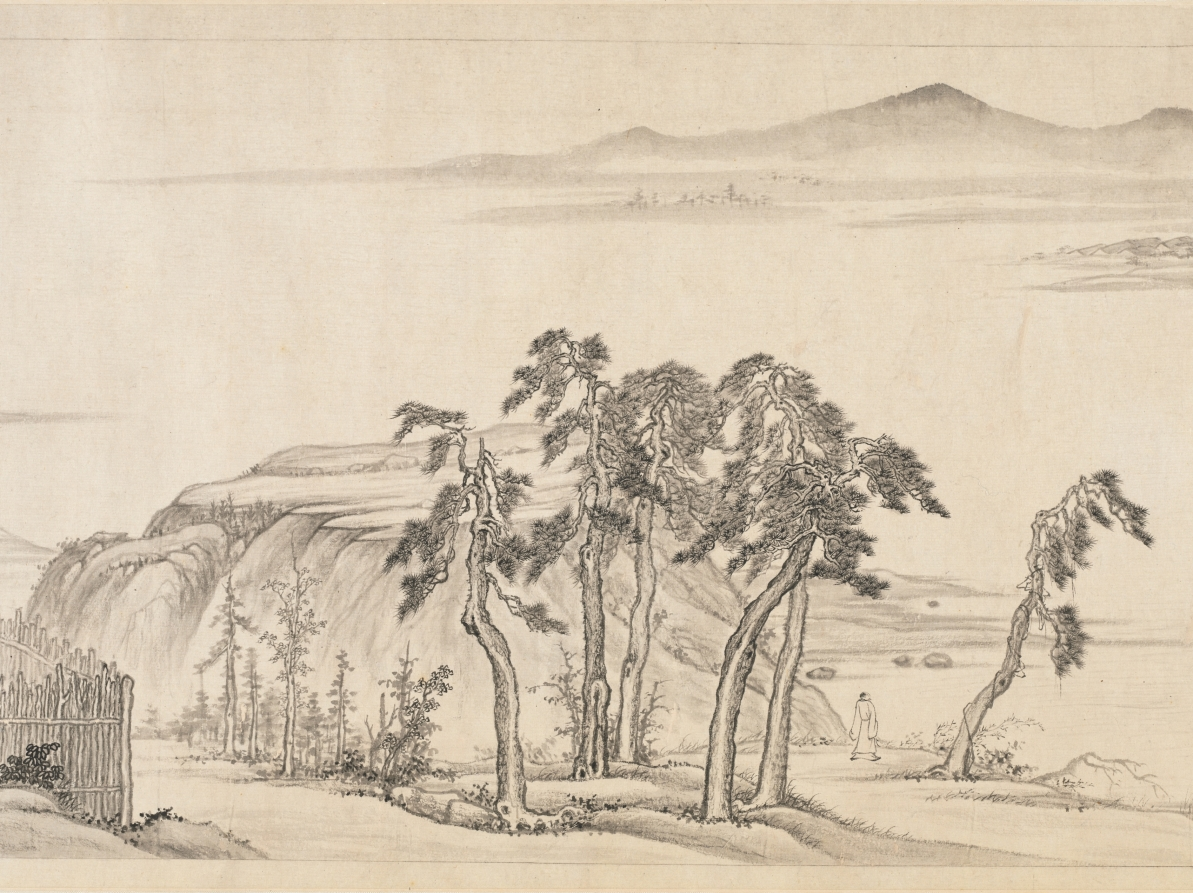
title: Meditative Visit to a Mountain Retreat: In Picture and in Words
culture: China, Ming dynasty (1368–1644)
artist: Xiang Shengmo (Chinese, 1597–1658)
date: 1648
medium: handscroll; ink on paper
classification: Painting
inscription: Artist's title and 3 seals (in front of painting): [title] Meditative Visit to a Mountain Retreat: In Picture and in Words 巖栖思訪圖詠 [3 seals] Tian lai ge zhong wen sun 天籟閣中文孫; Xiang shi kong zhang zui xin han mo 項氏孔彰醉心翰墨; Qing fu yuan zhong di yi miao ye 清福緣中第一妙業.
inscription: [印] 兔烏叟; 考古正今. 觀斯人兮何逍遙，非逍遙兮思其友。 思其友兮天一方，欲一訪之難回首。 松耶柏耶稱後凋，巖穴霏微何二酉。 山兮水兮人悠悠，遠莫致之神交否？ 河關一向望不及，言笑于今更非偶。 問游魚兮樂何深？問飛鳥兮歸何藪？ 問猿鶴兮何親疎？問鹿豕兮何夭壽？ 問白雲兮從何來？問流泉兮向何走？ 問漁樵兮何江山？問草木兮何畝畎？ 問春秋兮何炎涼？問世人兮何長久？ 問日月兮何晦明？曾見當時烏兔叟？ 戊子嘉平之初偶作此圖并題。 胥樵項聖謩識。 [印] 兔烏叟; 項氏孔彰; 未喪斯文.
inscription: 13 additional seals: 4 of Tang Zuomei 唐作梅 (late 18th–19th century); 3 of Zhang Baixi 張百熙 (1847–1907); 4 of Zhang Heng 張珩 (1915–1963); 2 unidentified.